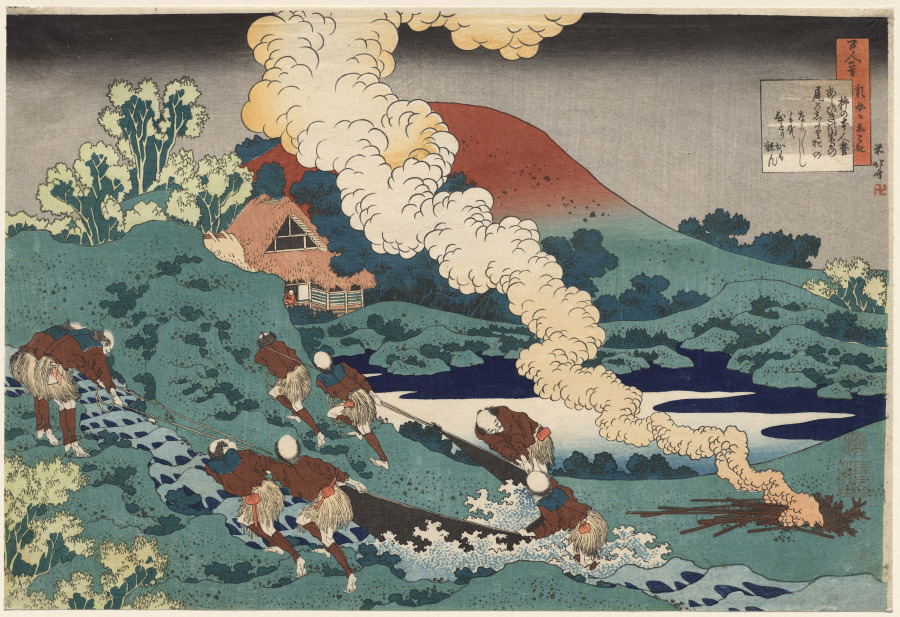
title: Poem by Kakinomoto no Hitomaro, from One Hundred Poems by One Hundred Poets Explained by an Old Nurse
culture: Japan, Edo period (1615–1868)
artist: Katsushika Hokusai (Japanese, 1760–1849)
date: 1835–36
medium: color woodblock print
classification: Print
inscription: Signature: Zen Hokusai 前北斎. Artist's Seal: Manji 卍. Publisher: Nishimuraya Yohachi (Eijudo 永寿堂). Censorship Seal: kiwame 極.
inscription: Poem: あしひきの 山鳥のをの しだりをの ながながしよを ひとりかも寝ん Ashibiki no/ yamadori no o no/ shidari o no/ naganagashi yo o/ hitori ka mo nemu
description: Katsushika Hokusai designed this print series from the perspective of a confused nurse attempting to illustrate classical poetry but missing the subtle allusions. This interpretation creates what would have been considered a comical disconnect between poem and image. The poem, by Kakinomoto no Hitomaro (about 660–739), reads as follows: Must I sleep alone through the long autumn nights, long like the dragging tail of the mountain pheasant separated from his dove? —translation by Joshua Mostow Hitomaro wrote of an emotionally tiring night. The nurse thought instead of the physically exhausting work of fishermen dragging a net upstream. Smoke billows across the scene, directing our attention to a figure, perhaps the nurse, in the distant house.